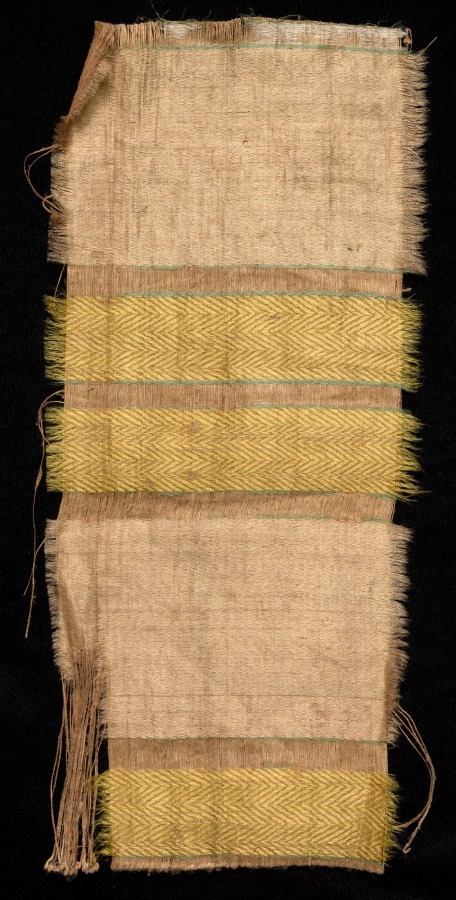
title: Brocade Fragment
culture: India, 19th century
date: 1800s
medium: brocade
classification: Textile